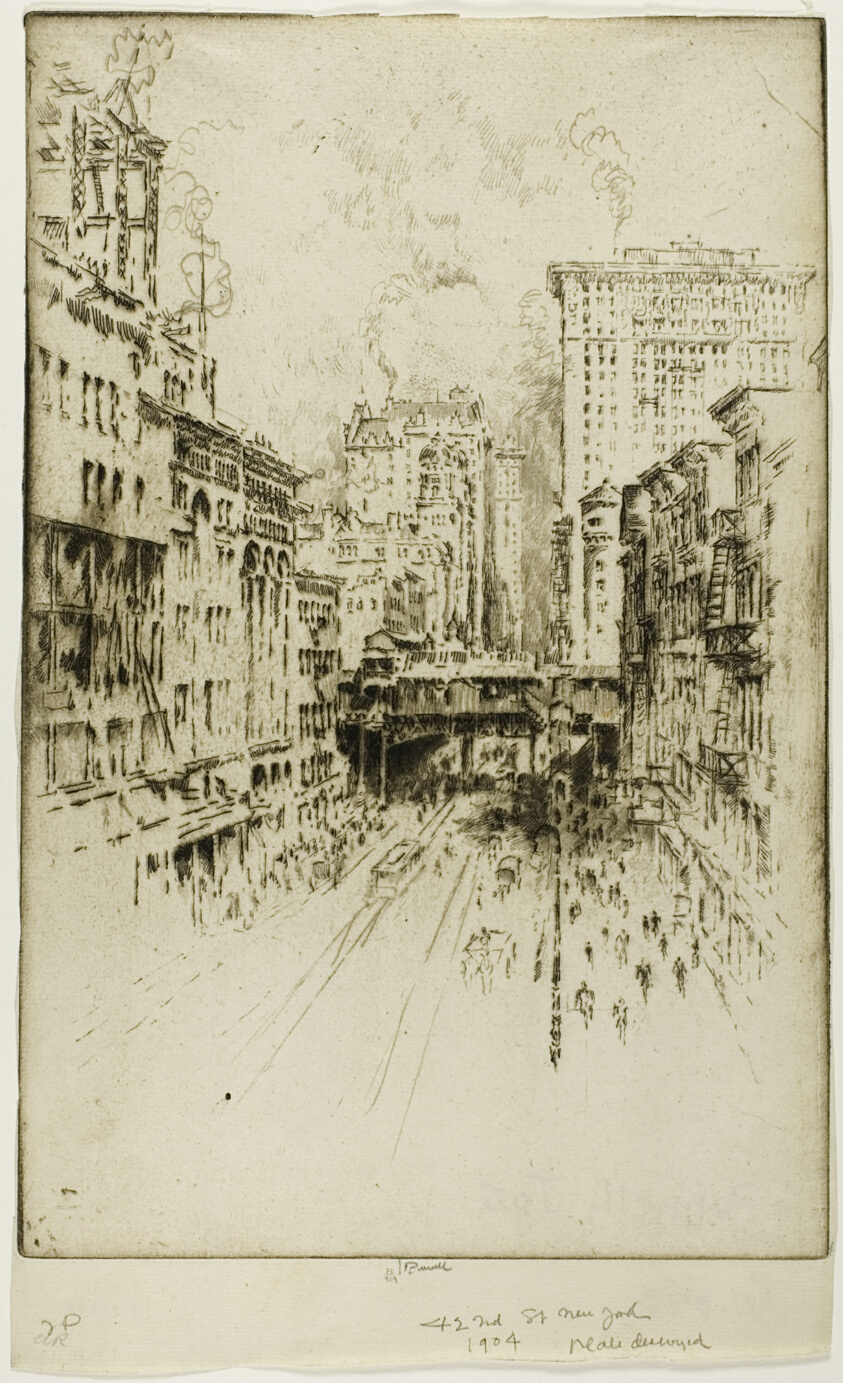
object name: Print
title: Forty-Second Street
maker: Joseph Pennell (American, 1857-1926)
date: 1904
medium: Etching on ivory laid paper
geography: United States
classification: etching; print; prints and drawing